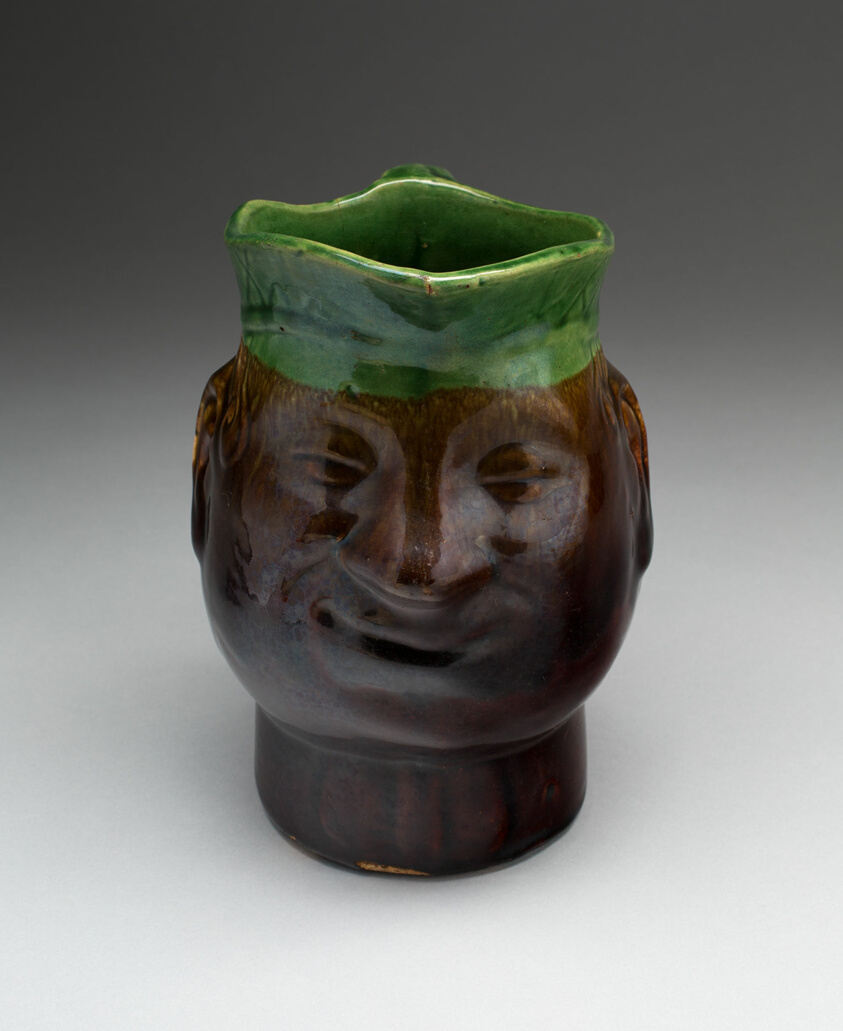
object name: Decorative Arts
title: Pitcher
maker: Artist unknown (American, 19th–20th century); Probably Pennsylvania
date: 1890–1900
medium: Earthenware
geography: Pennsylvania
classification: pitcher (vessel); earthenware; vessel; ceramics; american decorative arts; american arts; decorative arts